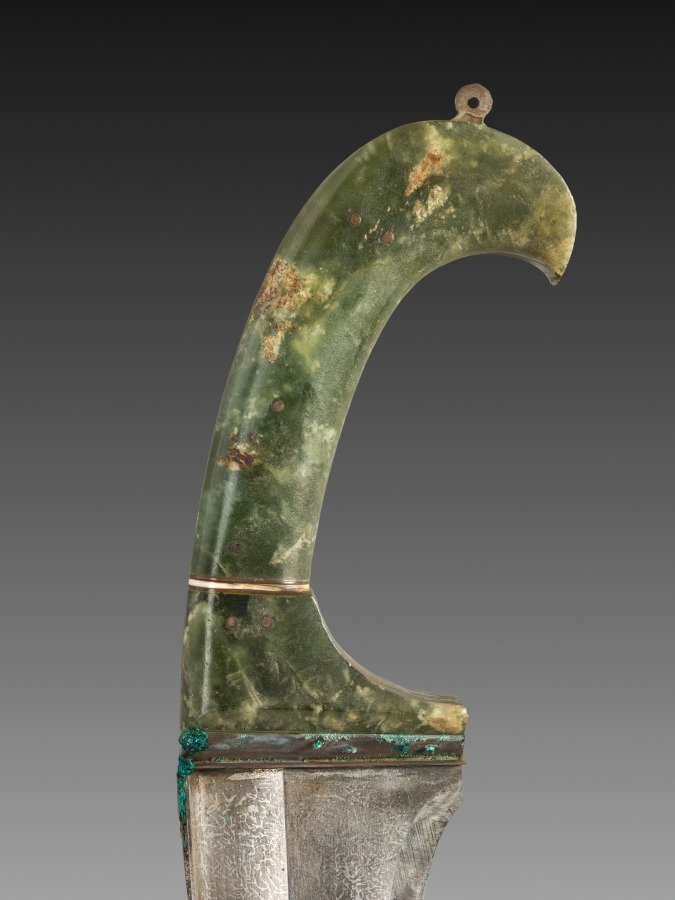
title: Dagger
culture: India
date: 1800s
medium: iron with bone and silver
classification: Arms and Armor